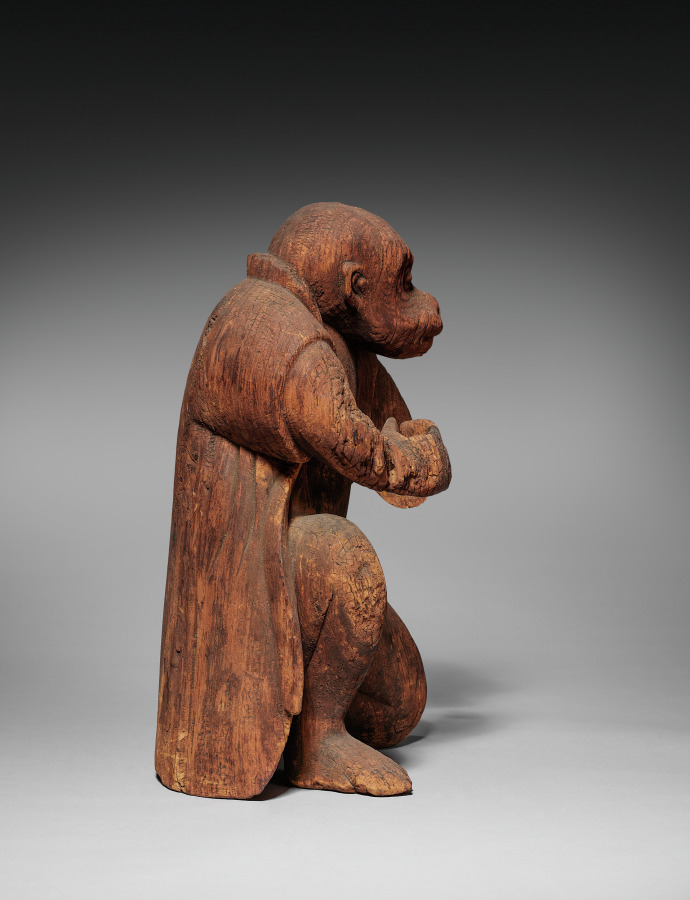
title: Monkey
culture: Japan, Edo period (1615–1868)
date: possibly 1700s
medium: wood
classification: Sculpture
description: Watching monkeys perform was once a popular form of street entertainment in Japan. Monkeys were outfitted with costumes and learned to perform dances and tricks. Monkeys also serve as the messengers of certain kami, or deities, and pairs of clothed monkey sculptures in wood or stone may be found on either side of the entrance of some jinja, or shrines dedicated to kami. This monkey has a jacket and may have once held bells and a fan. Unfortunately, its original identity and purpose have been lost.